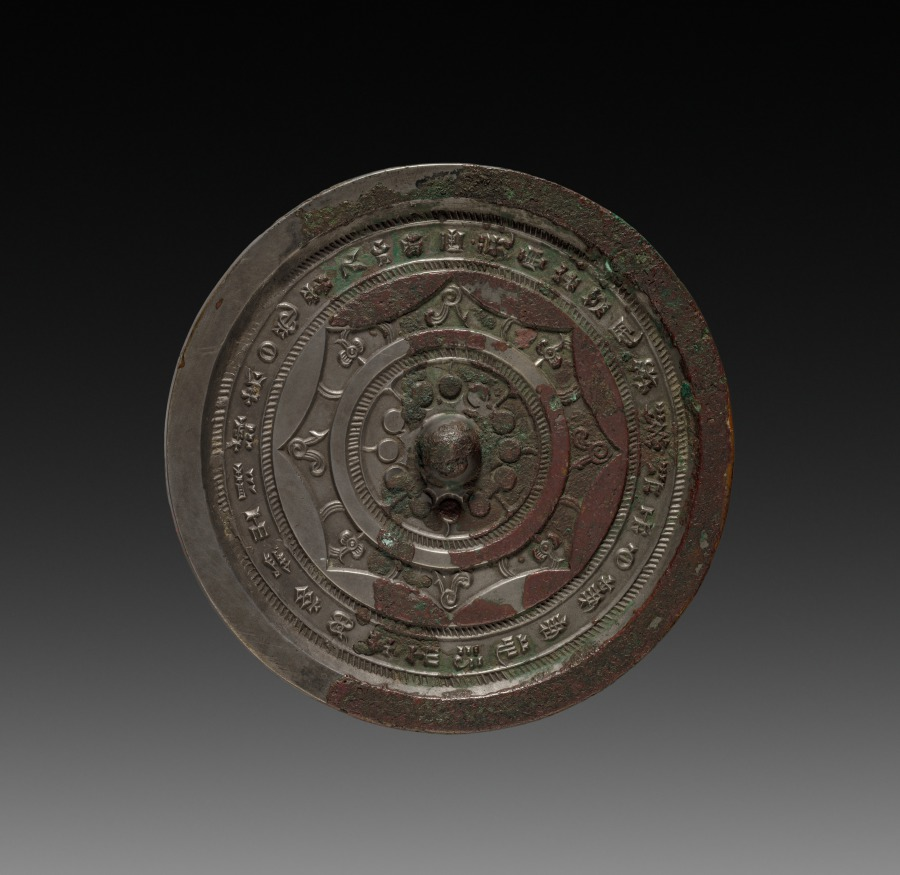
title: Mirror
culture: China, Eastern Han dynasty (25–220 CE)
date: 25–220 CE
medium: bronze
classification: Metalwork